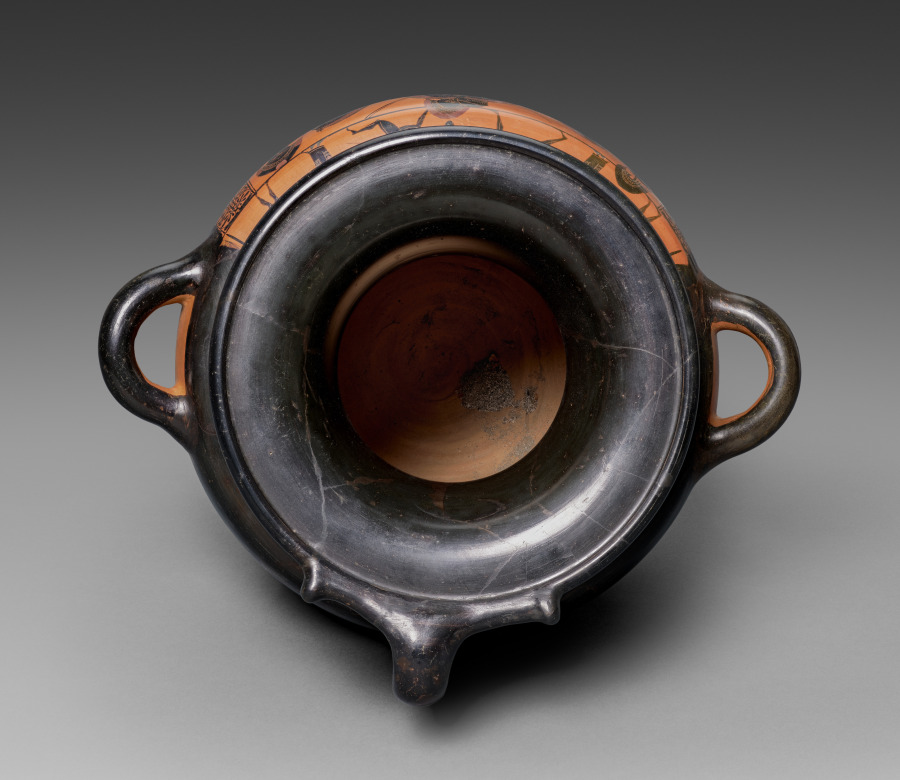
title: Black-Figure Hydria (Water Vessel): Frontal Quadriga (Body); Theseus and Minotaur (Shoulder)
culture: Greece, Attic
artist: attributed to Antimenes Painter (Greek, Attic, active c. 530–510 BCE)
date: c. 520 BCE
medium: ceramic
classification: Ceramic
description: Although their subjects differ, the three fields of figured decoration on this vessel relate to one another metaphorically through the theme of victory. Just as Theseus defeats the Minotaur on the shoulder, two lions converge on a deer in the predella (the small, lowermost panel). In the largest panel, victory is still to come, presumably for all three warriors shown: one in the chariot behind his driver, and one on foot on either side. Somewhat unusually, two of the warriors look directly out at the viewer, their frontal faces an interesting complement to the much more common frontal chariot.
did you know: This type of water vessel, a hydria, takes its name from hudor, Greek for water (and still familiar in the English root hydro).